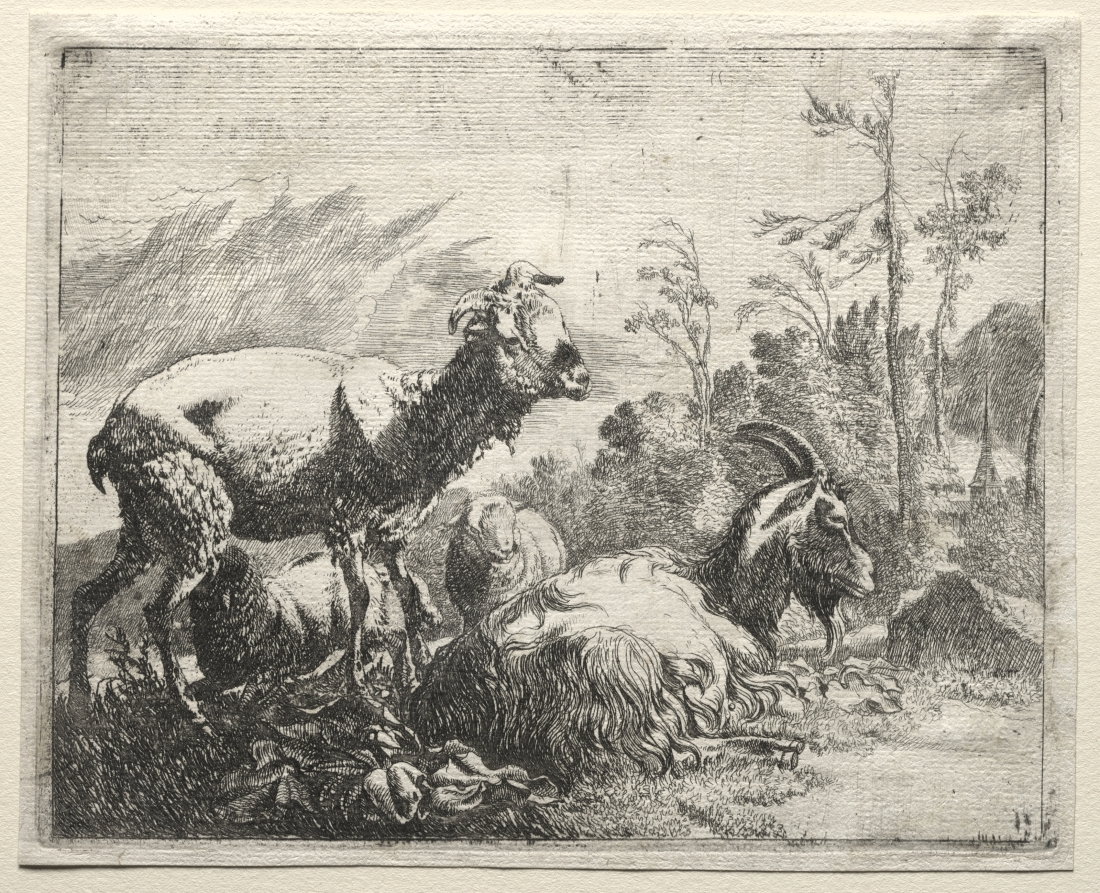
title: Goats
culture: Germany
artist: Johann Heinrich Roos (German, 1631–1685)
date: 1665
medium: etching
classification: Print